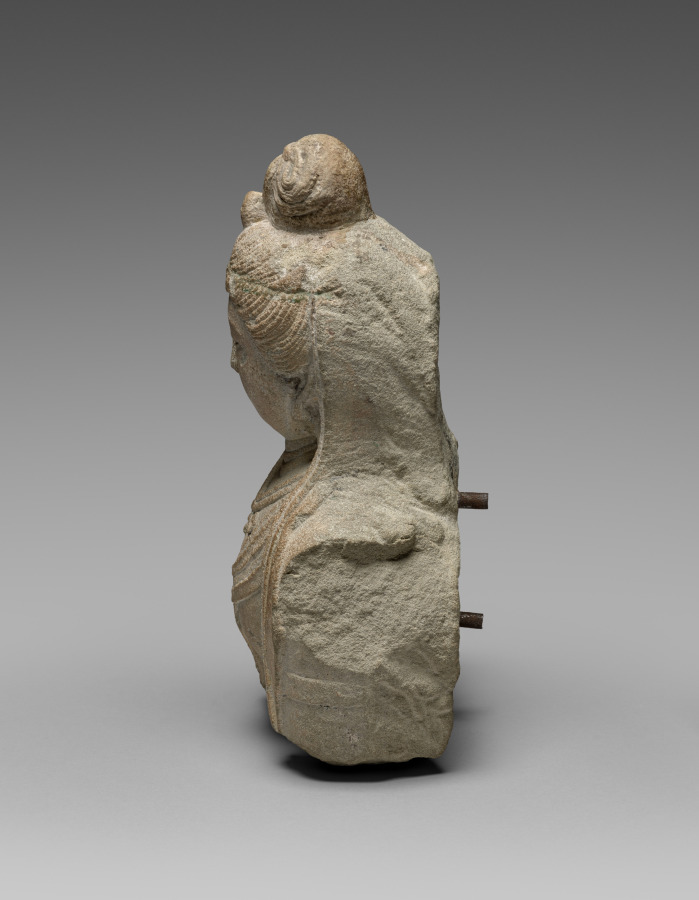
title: Bodhisattva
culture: China, Shanxi province, Taiyuan, Tianlongshan caves, Cave 6, Tang dynasty (618-907)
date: early 700s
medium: light gray limestone with traces of polychromy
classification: Sculpture